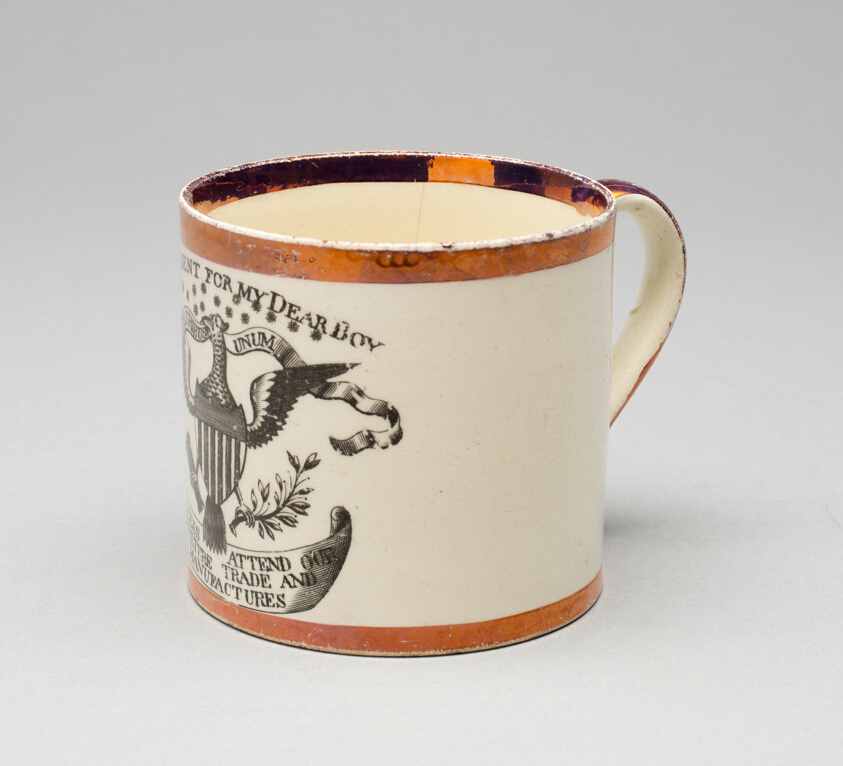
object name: Decorative Arts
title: Mug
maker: English for the American market; Leeds, England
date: c. 1820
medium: Earthenware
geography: Leeds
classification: drinking vessel; earthenware; american decorative arts; ceramics; decorative arts